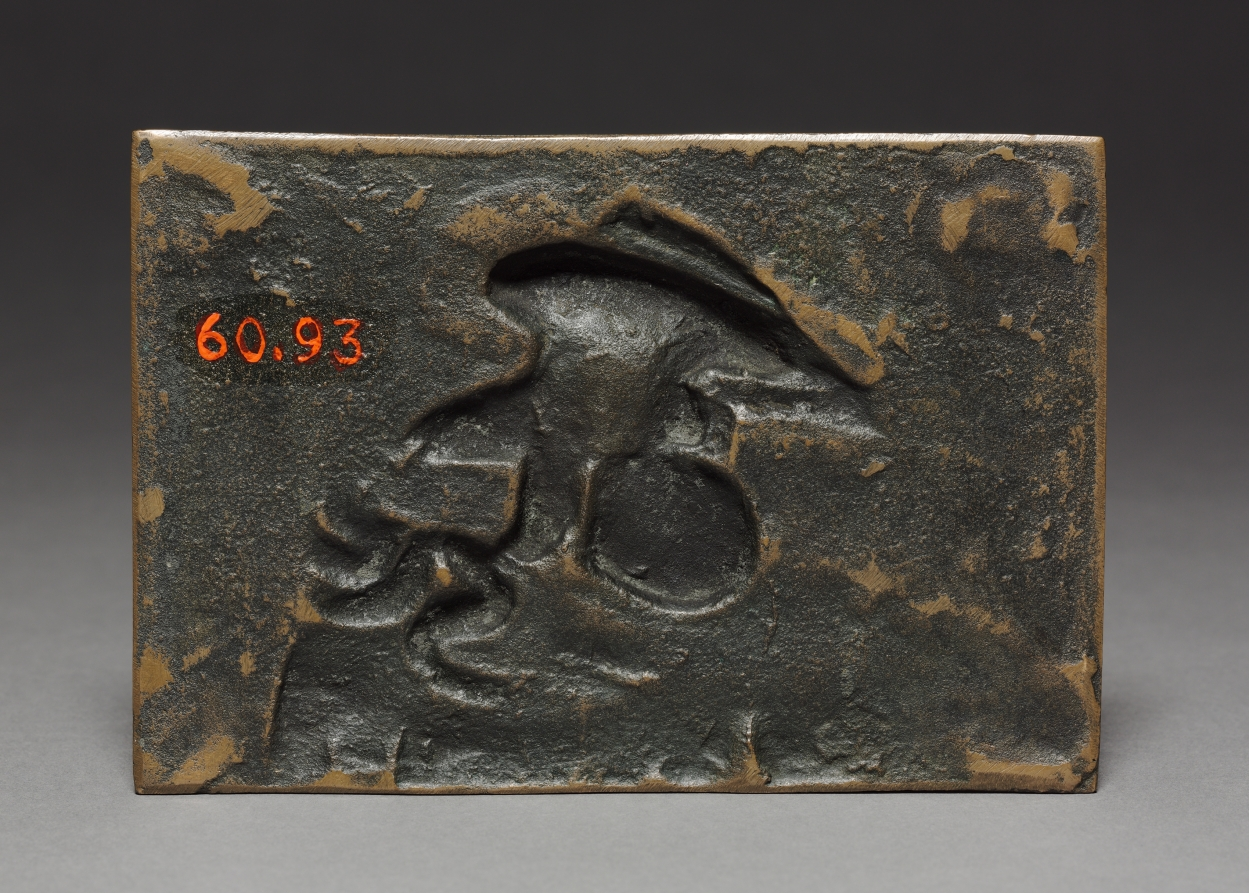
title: Plaque: Eagle with Snake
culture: France, 19th century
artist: Antoine-Louis Barye (French, 1796–1875)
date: c.1830 – 1875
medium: bronze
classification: Sculpture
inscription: Signed lower left: "Barye"